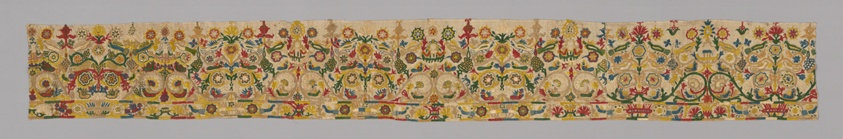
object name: Textile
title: Border (For a Skirt)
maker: Greece, Crete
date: 18th century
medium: Linen, plain weave; embroidered with silk in chain, closed herringbone, Cretan, open chain, overcast back, satin, single back, and stem stitches; French knots; six panels joined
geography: Kríti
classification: textile; needlework (visual works)